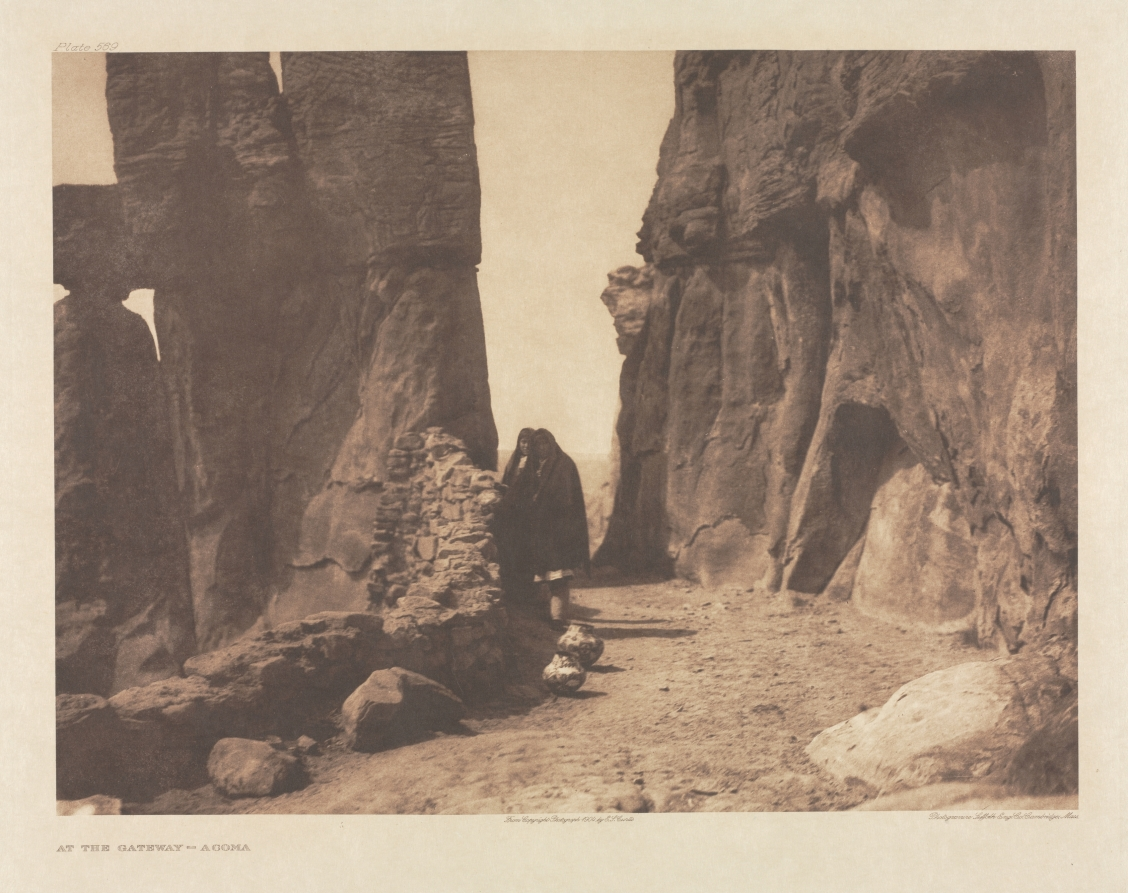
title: Portfolio XVI, Plate 569: At the Gateway - Acoma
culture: America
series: The North American Indian: being a series of Portfolios picturing and describing the Indians of the United States, the Dominion of Canada, and Alaska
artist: Edward S. Curtis (American, 1868–1952)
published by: The University Press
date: 1904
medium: photogravure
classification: Portfolio